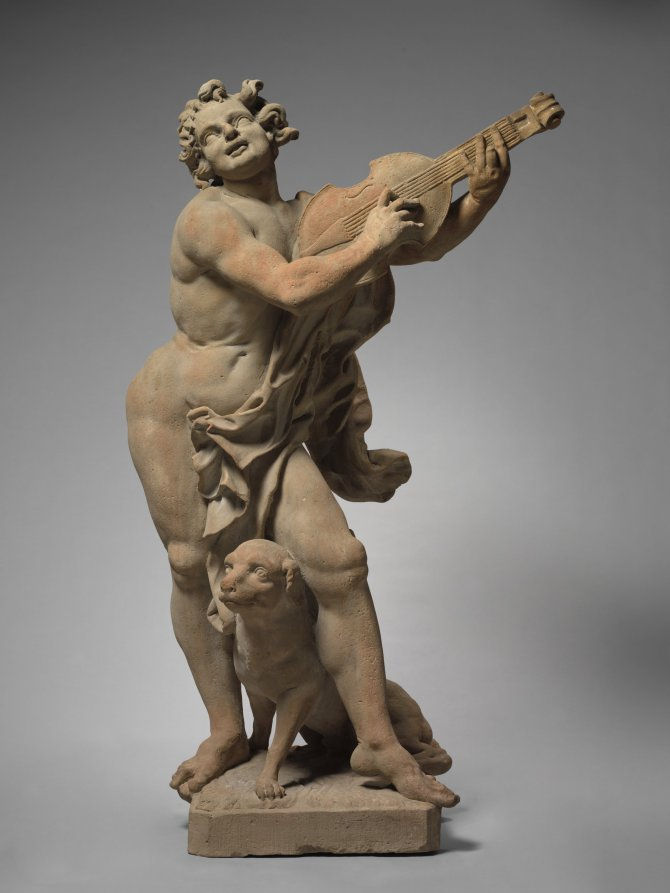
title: Orpheus and Cerberus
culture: Germany, near Bamberg, 18th century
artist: Ferdinand Tietz (Austrian, 1708–1777)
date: c. 1765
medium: sandstone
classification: Sculpture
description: This work was one of numerous sculptures Tietz created for the gardens of Schloss Seehof, near Bamberg in Bavaria (Germany), the summer residence of the Prince Bishops of Bamberg. The exaggerated forms of Orpheus's face and musculature caricature the idealized proportions of classical sculpture. A further parody exists with his companion: the usually terrifying hound Cerberus is here nothing more than a docile puppy, sitting calmly at Orpheus's feet. Meant to be viewed outdoors, on a high pedestal and from a distance, this work is less finely detailed than sculptures Tietz made for indoor settings at Seehof.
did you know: Taught to play the lyre by the Greek god Apollo, Orpheus's legendary musical abilities had the power to charm animals.